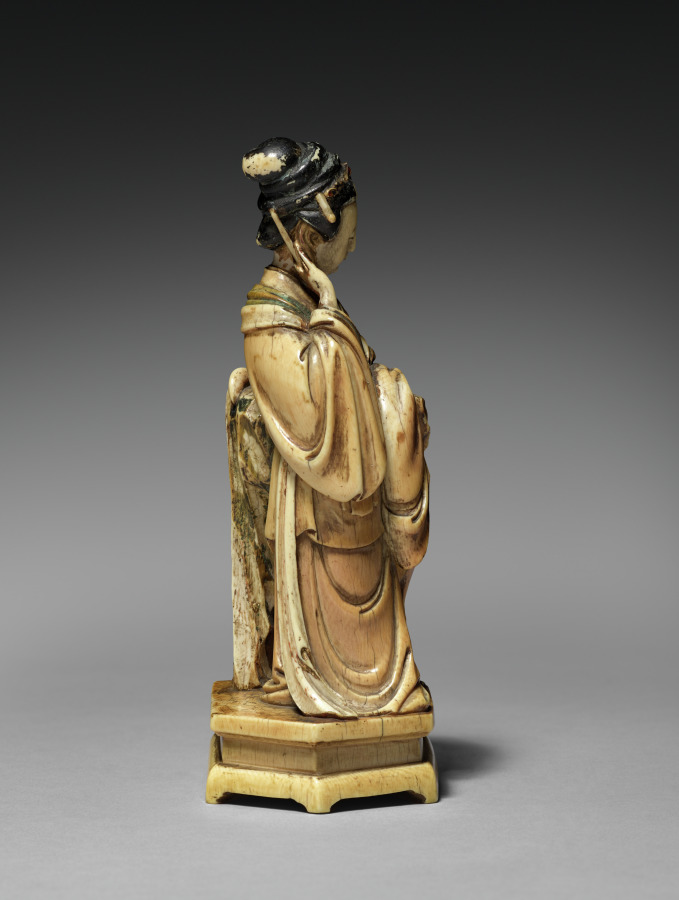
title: Female Figure with Crane and Squirrel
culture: China, Qing dynasty (1644-1911), Kangxi reign (1662-1722)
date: 1662–1722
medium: ivory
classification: Ivory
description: In the Qing dynasty (1644–1911), luxury items became more affordable to larger parts of the society, including women, merchants, and literati in non-official positions. Imperial patronage and a growing urban population encouraged consumption of luxury goods and local craftmanship. This ivory form of a woman with a crane illustrates the superb skills and the creative mind of the talented artisan who sought clients on a competitive market.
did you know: The ivory has aged to a rich amber, while traces of its original red and green paint remain on the woman’s cuffs and collar.